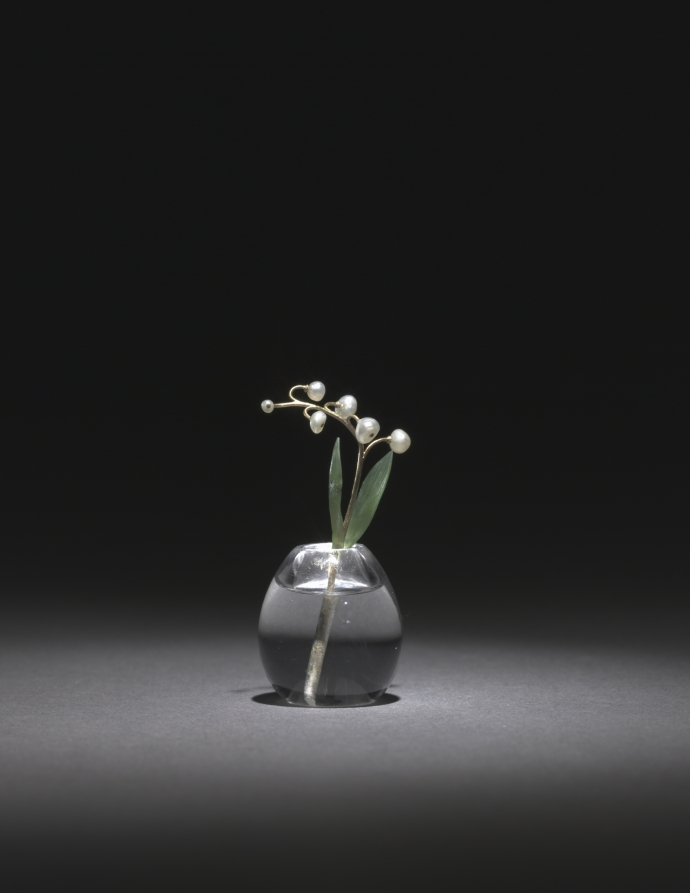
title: Flower Study of a Miniature Lily of the Valley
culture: Russia, St. Petersburg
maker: House of Fabergé (Russian, 1842–1918)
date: c. 1885–1915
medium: pearls, jade, rock crystal, gold, diamonds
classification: Miscellaneous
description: A small, carved rock crystal vase holds this lily of the valley study. The pearls, forming the flower’s buds, are drilled and attached to the remarkably slim gold stem. The hand-cut nephrite (jade) leaves enhance the naturalistic aura of the flower. Fabergé’s inspiration for his flower studies is said to have come from the floral brooches of precious stones that were made in the 1700s for Catherine the Great as well as from the Japanese art of flower arranging, known as ikebana.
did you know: Small and delicate, Fabergé’s flower studies were given as intimate gifts to friends by Tsarina Alexandra and others in the court. She kept them in all the palaces as a reminder of spring during the harsh Russian winters.